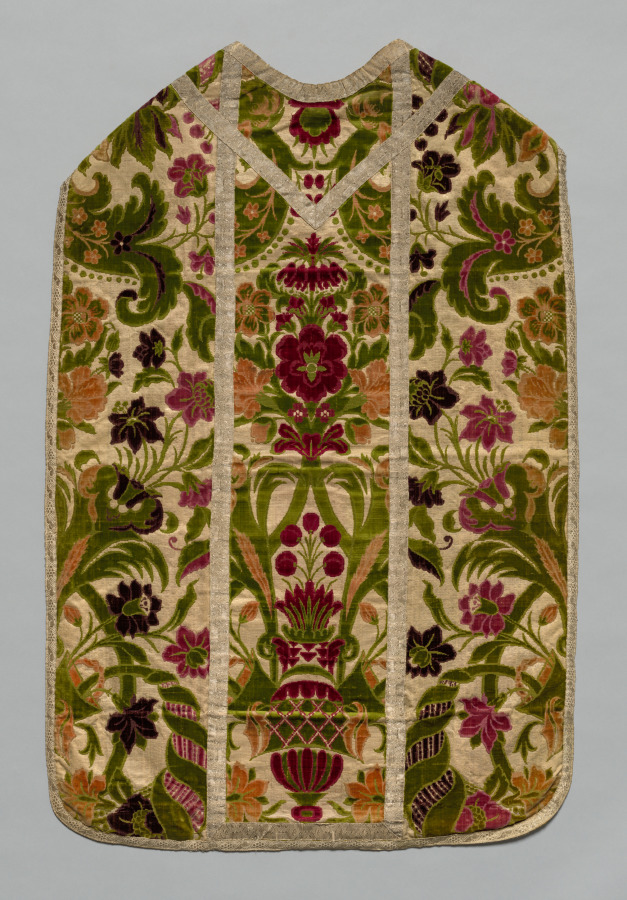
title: Chasuble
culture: Italy, Genoa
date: c 1600–1700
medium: Silk and gilt metal threads, woven; cut and uncut velvet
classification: Velvet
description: This sumptuous polychrome velvet displays a central vase with abundant flora and exotic leaves flanking curving blossoming fronds on a gilt-metal thread ground. The pattern was created with five colors of cut and uncut (loops) velvet pile. Only the pile warps for the lush green velvet occur across the entire cloth, while each additional color appears in vertical stripes—crimson, peach, rose, and purple. These widely acclaimed velvets from Genoa were the most colorful woven in Europe. Both the long stole and the shorter maniple are insignia of the office of deacons, priests, and the higher clergy. The stole was worn under a chasuble according to the office and the maniple was hung on the left forearm. The burse is a stiff receptacle in which the folded corporal, a white linen cloth on which the sacred bread and chalice are placed during the Mass, is carried to and from the altar. The upper fabric matches the chasuble, the bottom is a plain silk, and the interior has an obligatory linen lining.